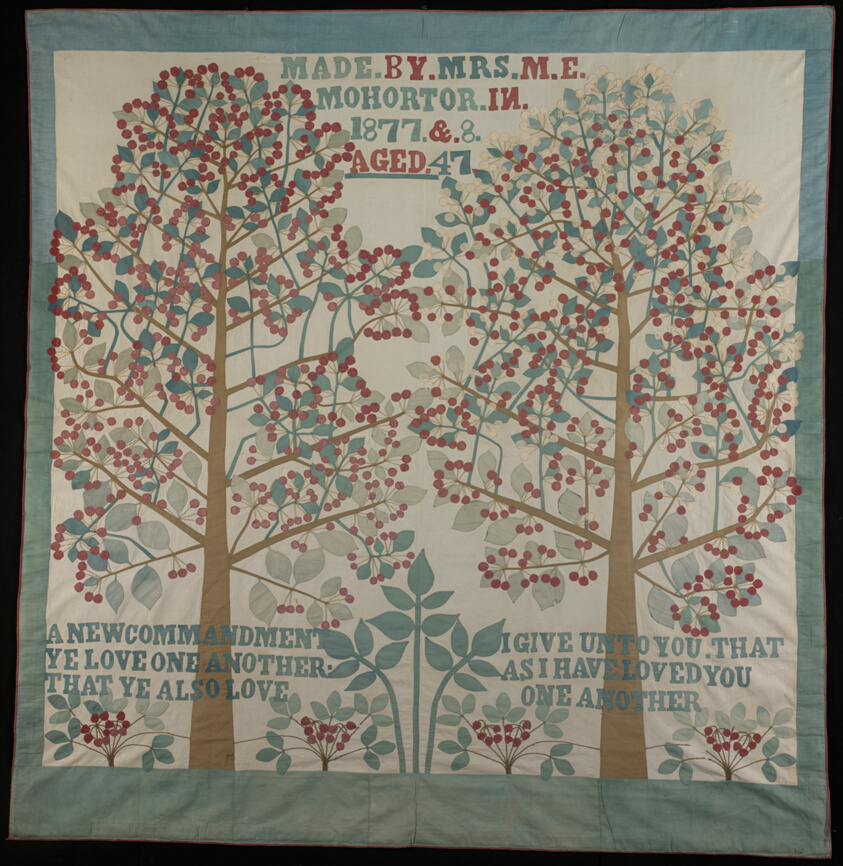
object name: Textile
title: Bedcover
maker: Designed and executed by Mrs. M. E. Mohortor; United States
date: 1877/78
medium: Cotton plain weave, pieced; appliquéd with cotton, plain weaves; embroidered with cotton and wool wrapped cotton cords of oblique interlacing in running stitches; laid work and couching; edged with cotton, plain weave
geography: United States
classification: needlework - quilt; textile